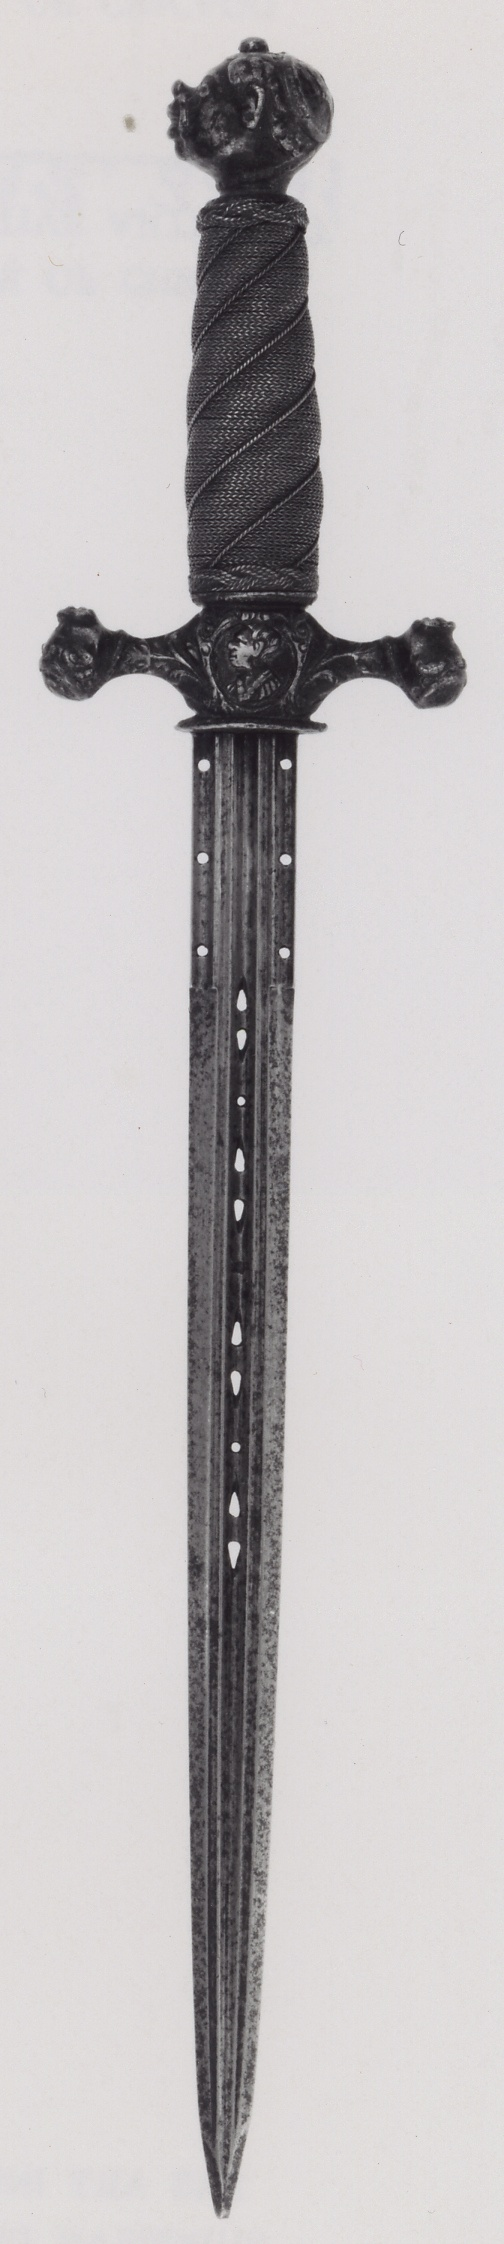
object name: Arms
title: Parrying Poniard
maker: German; Blade possibly Spanish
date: c. 1620/30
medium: Steel, wood, and brass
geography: Germany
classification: edged weapon-dagger; arms; arms and armor